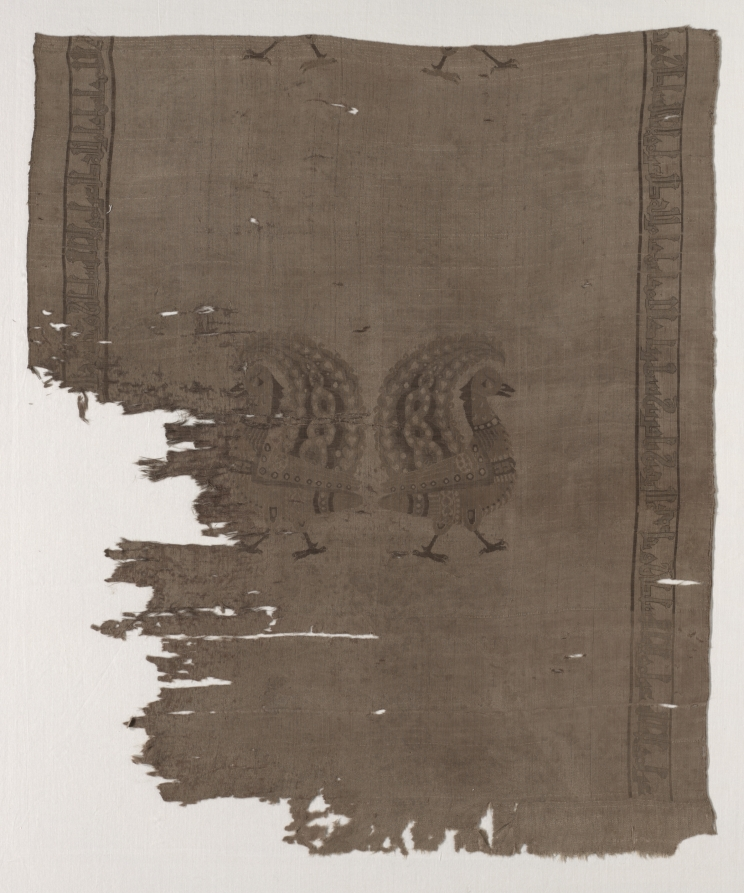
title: Fragment with peacocks and inscriptions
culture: Iran, in the style of the Buyid period (945–1055)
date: before 1968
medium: Silk: lampas weave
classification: Textile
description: This textile fragment preserves a pair of addorsed peacocks in tan on a plain tan background.